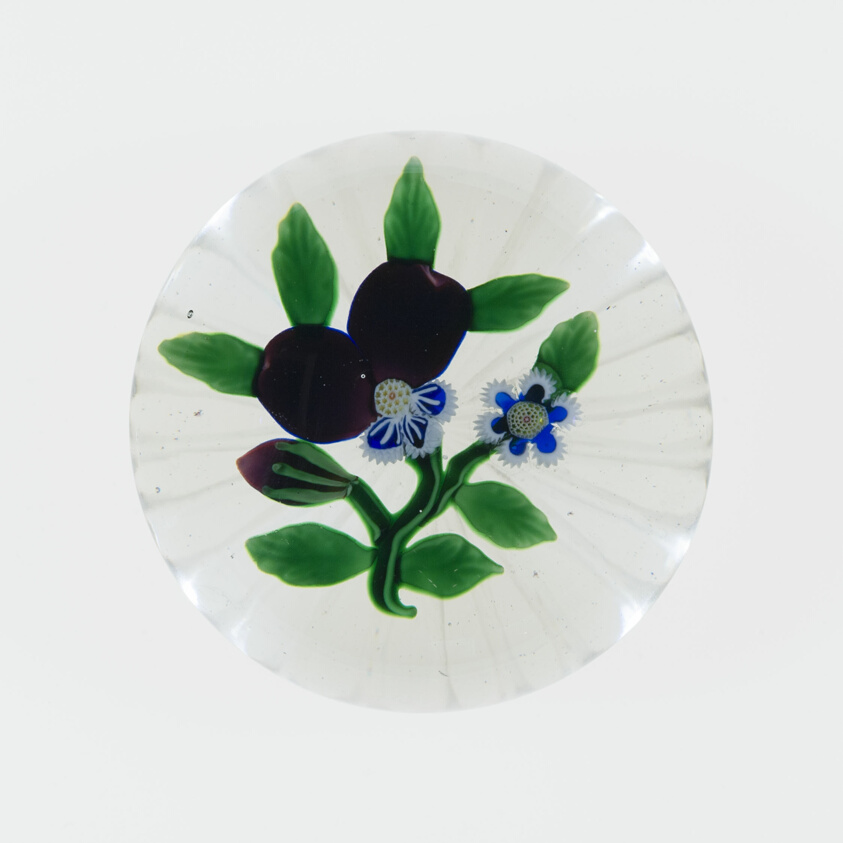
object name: Glass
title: Paperweight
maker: Baccarat Glassworks (Cristalleries de Baccarat); Lorraine, France, founded 1764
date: c. 1848–55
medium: Glass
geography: Lunéville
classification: paperweight; lampwork; european decorative arts; glass